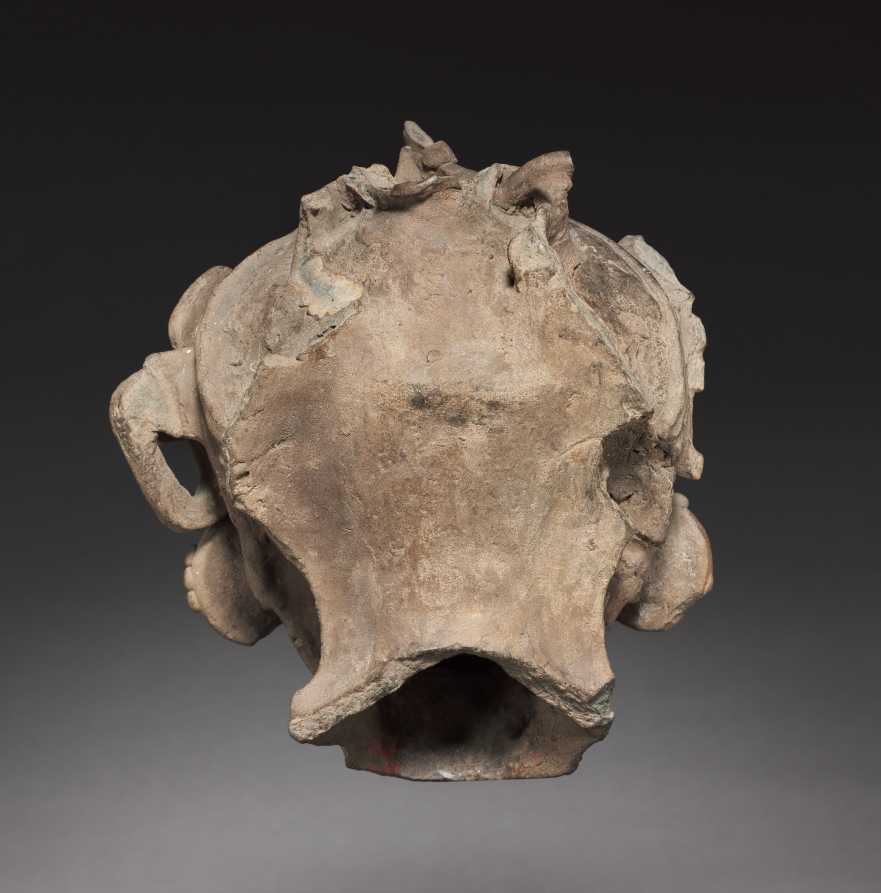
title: Head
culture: Mexico, Classic Veracruz, 7th-10th Century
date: c. 600–900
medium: earthenware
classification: Sculpture